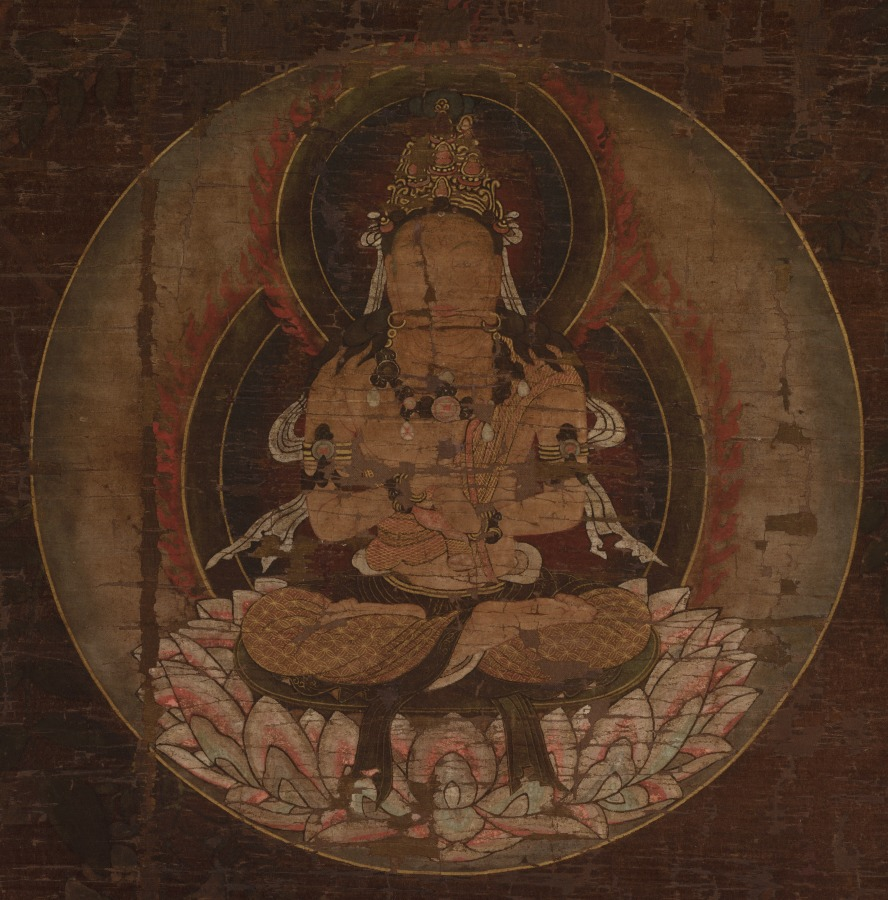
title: Fujiwara no Muchimaro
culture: Japan, Kamakura period (1185–1333)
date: 1200s or 1300s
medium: Hanging scroll; ink, color, gold, and cut gold on silk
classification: Painting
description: This portrait of Fujiwara no Muchimaro (680–737), a grandson of Fujiwara no Kamatari (614–669), includes an image of Buddha Dainichi Nyorai above his head. By situating the image of Dainichi there, this painting would seem to assert that Muchimaro is an avatar of Dainichi. In the same way that kami could be identified with Buddhist counterparts, powerful humans could also be seen as manifestations of Buddhist deities. A similar painting is at Eizanji in Nara, of which Muchimaro is known as the founder. It was once a branch temple of Kōfukuji, the Fujiwara family temple.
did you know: The boughs of wisteria appearing in the background symbolize the figure's status as a Fujiwara family member.